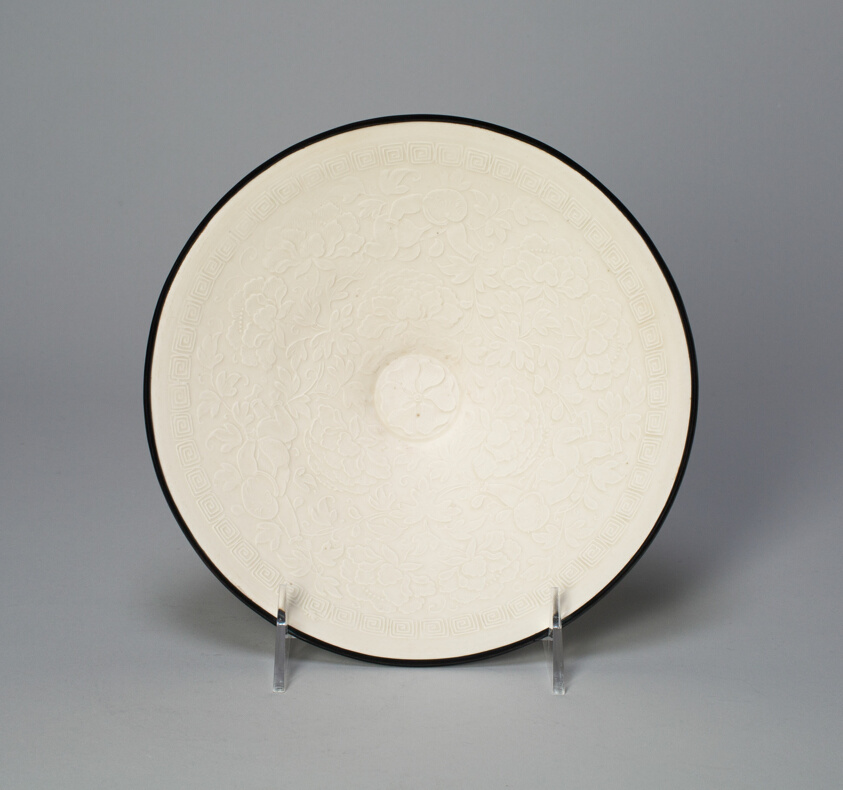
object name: Vessel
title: Bowl with Three Boys amid Peony Scrolls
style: Chinese (culture or style)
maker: China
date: Song dynasty (960–1279)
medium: Ding ware; porcelain with underglaze mold-impressed decoration; metal rim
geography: China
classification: bowl; porcelain; dish (vessel); asian art; ceramics; vessel